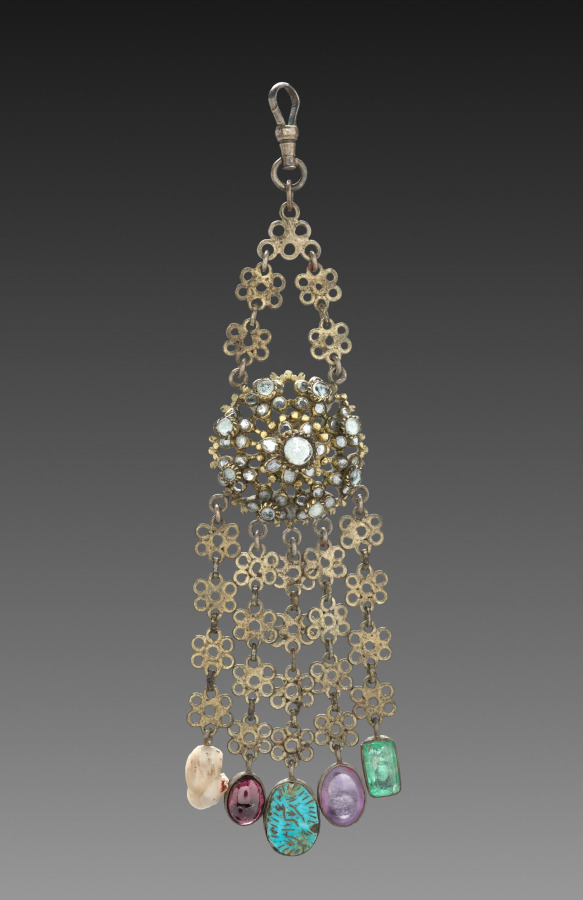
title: Watch Fob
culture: Russia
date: 1700s–1800s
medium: brass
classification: Jewelry